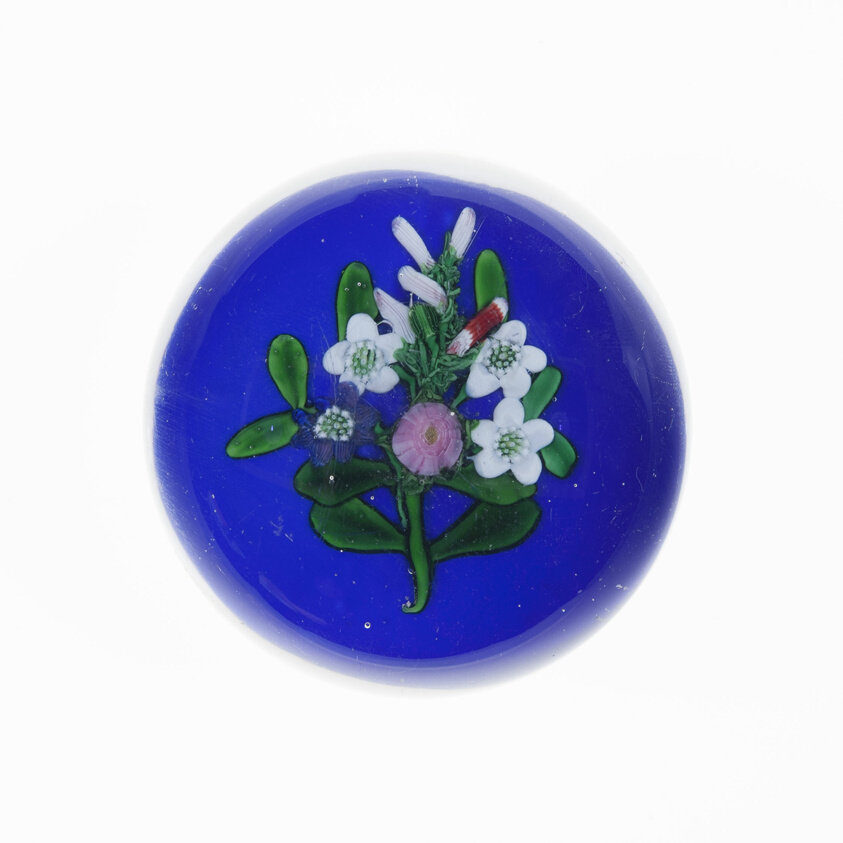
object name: Glass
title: Paperweight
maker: Clichy Glassworks (Cristalleries de Clichy); Clichy, France, 1837-1885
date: c. 1845/60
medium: Glass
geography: France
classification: paperweight; glass